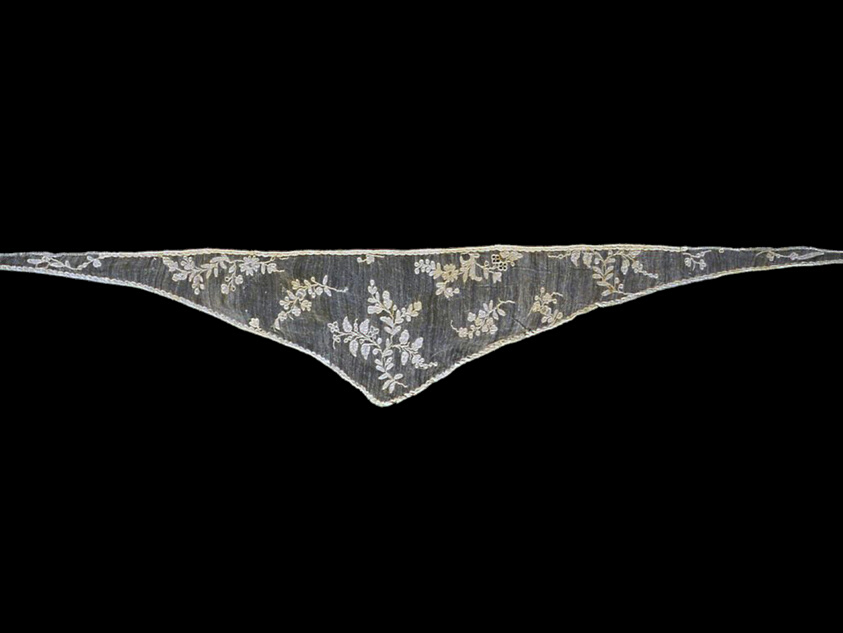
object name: Costume and Accessories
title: Shaped Sleeve Ruffle (Engageanté)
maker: Italy, Burano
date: 1770s/80s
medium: Linen, needle lace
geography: Burano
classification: costume accessory; lace - needle; textile; costume